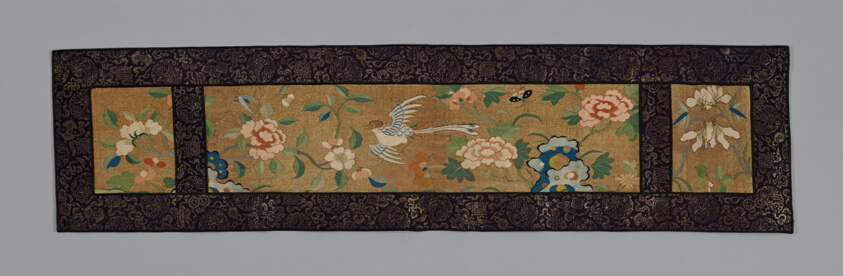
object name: Textile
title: Valance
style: ming, Chinese (culture or style), East Asian, asian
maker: China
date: Ming dynasty (1368–1644), 1600/44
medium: Gold Ko'ssu strip.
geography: China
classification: textile; weaving